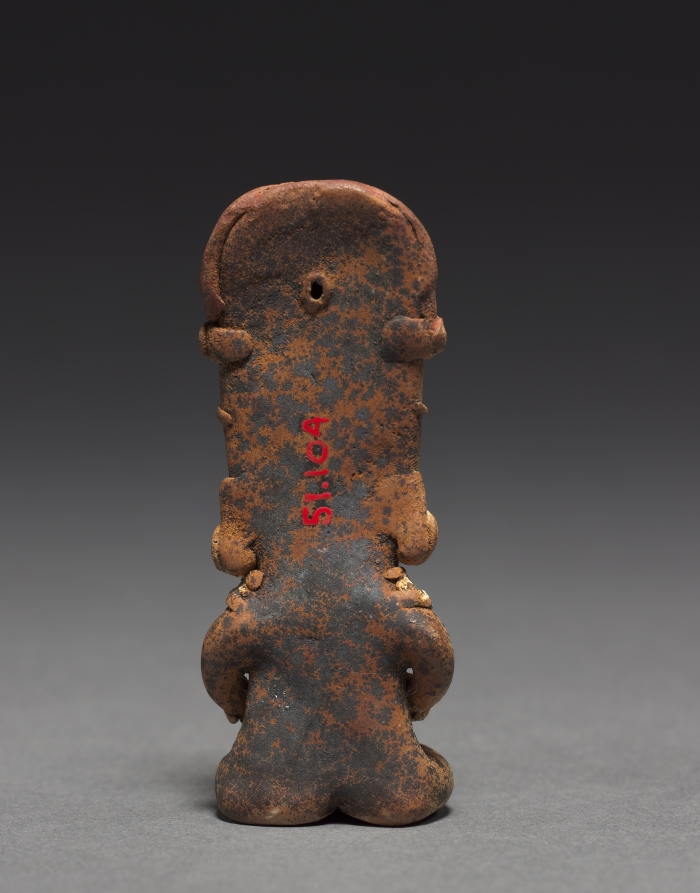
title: Seated Female Figurine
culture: Mesoamerica, Guanajuato or Michoacán, Chupícuaro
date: 600 BCE–250 CE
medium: ceramic, pigments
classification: Ceramic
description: Clay figurines, mainly nude females, were the most common art form of early villages throughout Mesoamerica. The meanings of these sweet, small, intimate works are not known, but they are found both in human burials and in household rubbish, suggesting varied uses.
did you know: Clay figurines, mainly nude females, were the most common art form of early villages throughout Mesoamerica.